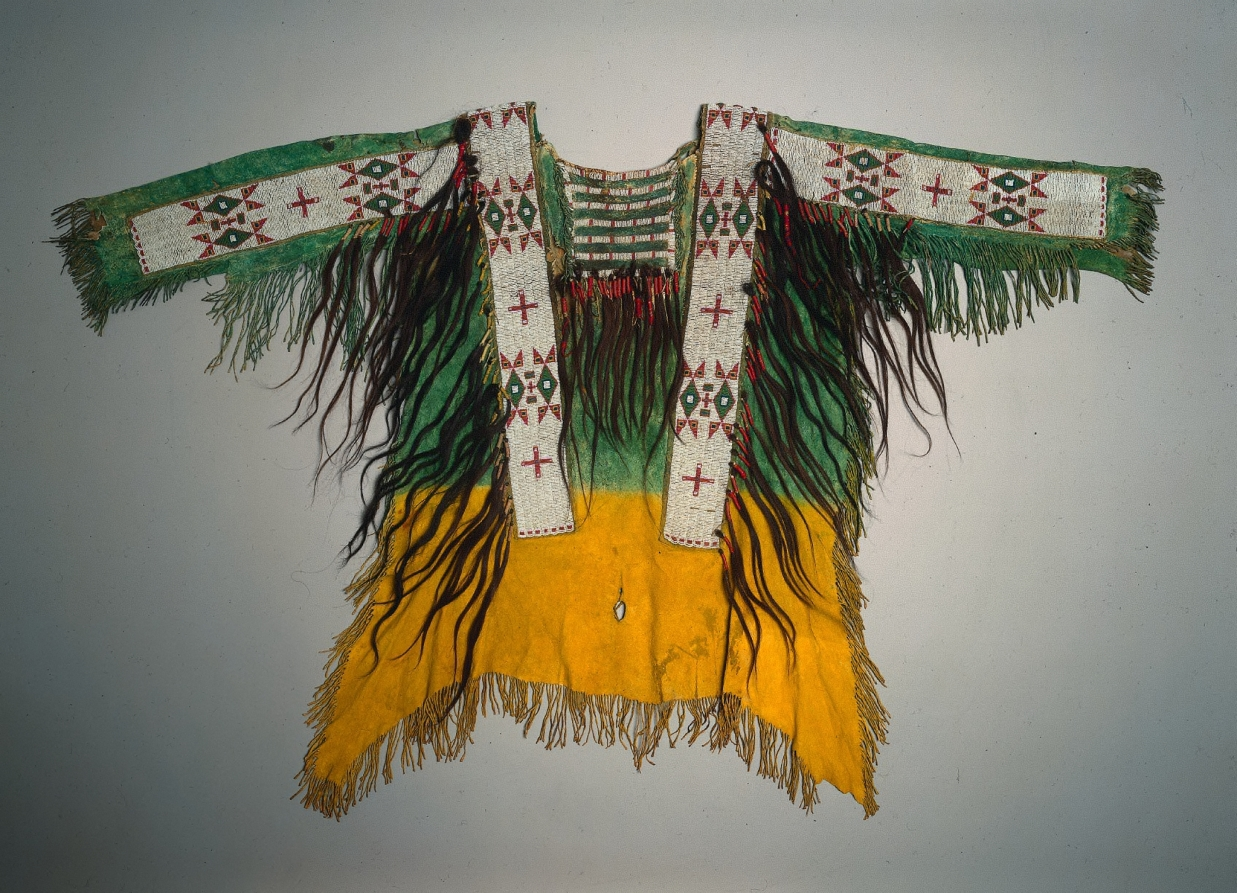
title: Hide Shirt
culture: America, Native North American, Central Plains, Lakota Sioux, 19th century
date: c. 1890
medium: hide, pigment, glass beads, human hair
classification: Textile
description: Traditionally, only Lakota (Sioux) head chiefs had the right to wear painted shirts, an honor they earned through sacrifice and bravery but lost by failing in their responsibilities. By the time this example was created, European Americans had confined the Lakota to reservations, and painted shirts had become the privilege of battle veterans rather than of active warriors. Family members probably donated the locks of hair, each representing a war exploit.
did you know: Only Lakota (Sioux) chiefs had the right to wear painted shirts, an honor they earned through bravery.